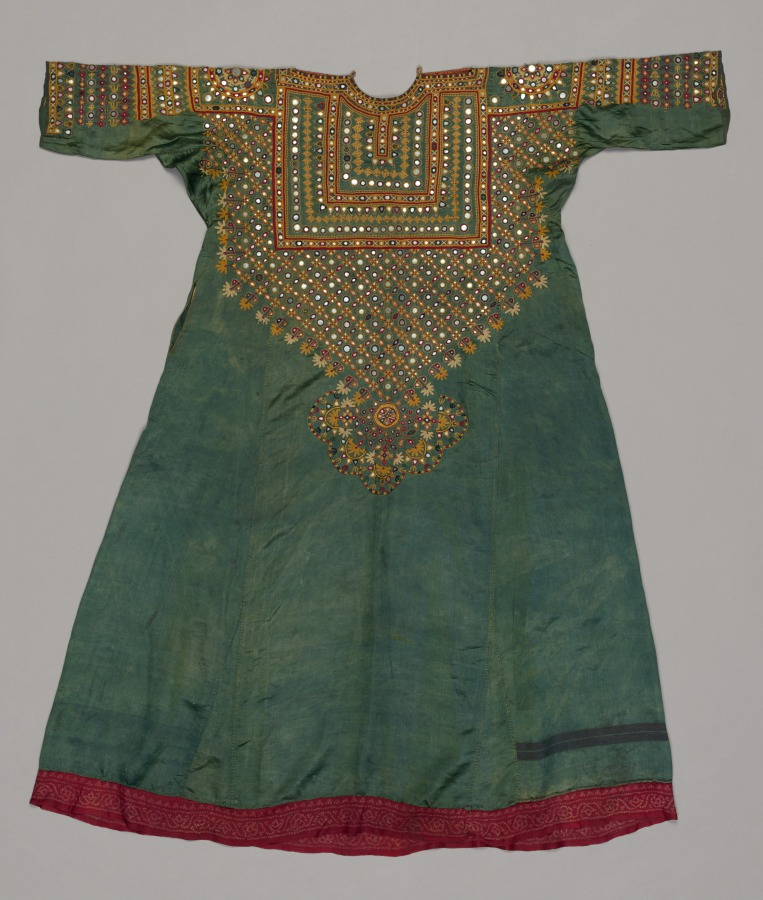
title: Woman's Dress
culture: Western India, Gujarat, Kachchh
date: 1800s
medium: silk thread on silk ground, embroidery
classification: Garment